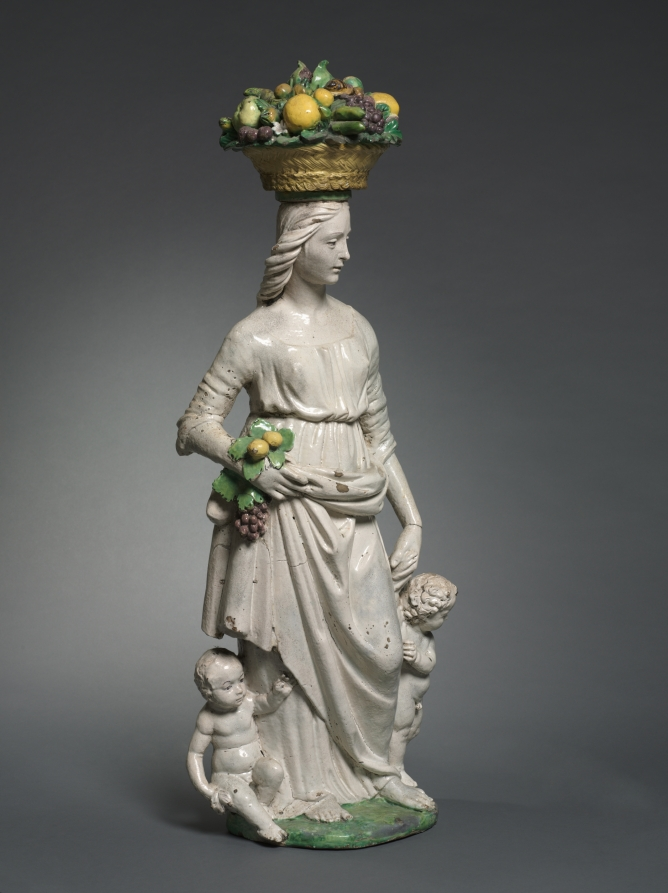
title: Dovizia (Plenty)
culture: Italy, Florence, 16th century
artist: Giovanni della Robbia (Italian, 1469–1529/30)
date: c. 1520–29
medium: glazed terracotta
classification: Sculpture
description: Many elite Florentine Renaissance homes had sculptures of idealized young women carrying nature’s bounty, such as this work. The motif stems from a statue by Donatello (about 1386–1466) that towered over Florence’s main public market. At home, however, the sculpture became a talisman for the family’s well-being. The city-state’s low birth rate was a serious political matter, and such a sculpture was believed to stimulate fertility while also promoting motherhood and bolstering financial success.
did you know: Inspired by an over life-sized, public sculpture by Donatello, Giovanni della Robbia reduced the figure for a domestic setting.